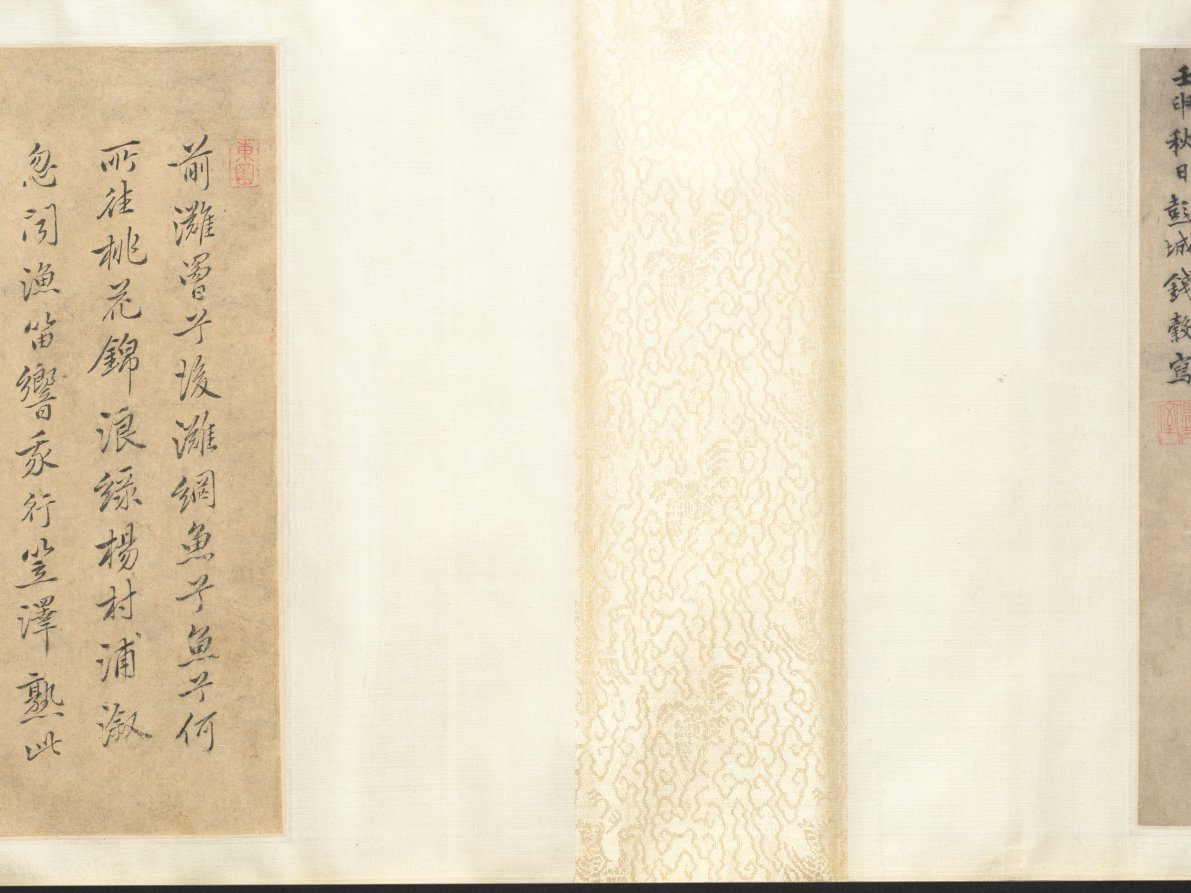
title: Fisherman's Joy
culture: China, Ming dynasty (1368–1644)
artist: Qian Gu (Chinese, 1508–c. 1578)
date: 1572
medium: Handscroll; ink and light color on paper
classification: Painting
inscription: Artist's inscription, signature, and seal: On the autumn day of the jen-shen year [1572], P'eng-ch'eng, Ch'ien Ku painted [this]. [seal] Hsüan-ch'ing shih. 2 colophons, both dated 1689, and 5 additional seals of Yün Shou-p'ing (1633-1690).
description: This painting has a scene showing two small crafts, each manned by two fishermen, practicing a traditional fishing method. In one of them, a man uses a bamboo pole to direct the movements of a cormorant bird sent into the water. Cormorant fishing, witnessed in some areas of the lower Yangzi River, appears in Zhe school paintings. Qian Gu may have borrowed these narrative figure scenes from Zhe school paintings, while his vantage point, brushwork, and soft tones align with the Wu school style. Scenes of fishermen appealed to urban and educated audiences who idealized the self-sufficient independence of fisherfolk.